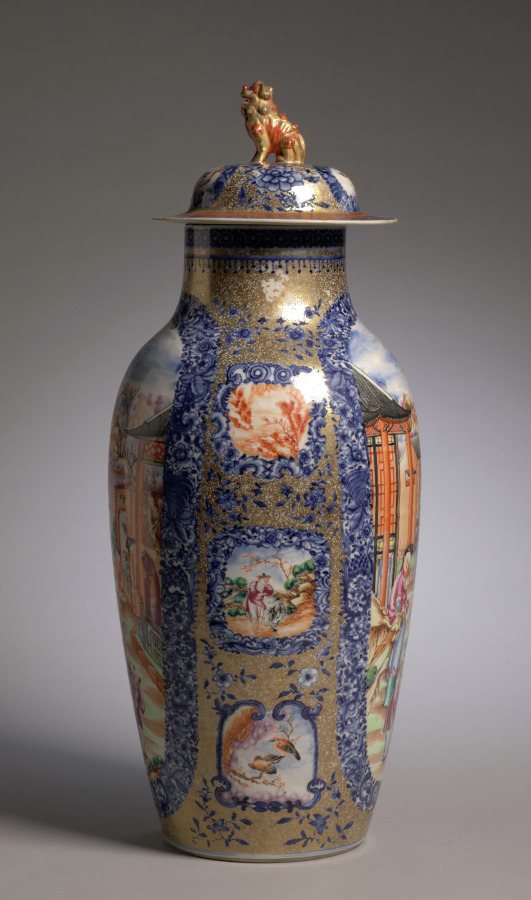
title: Covered Vase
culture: China, Chinese Export, 18th century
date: c. 1770–80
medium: porcelain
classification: Ceramic